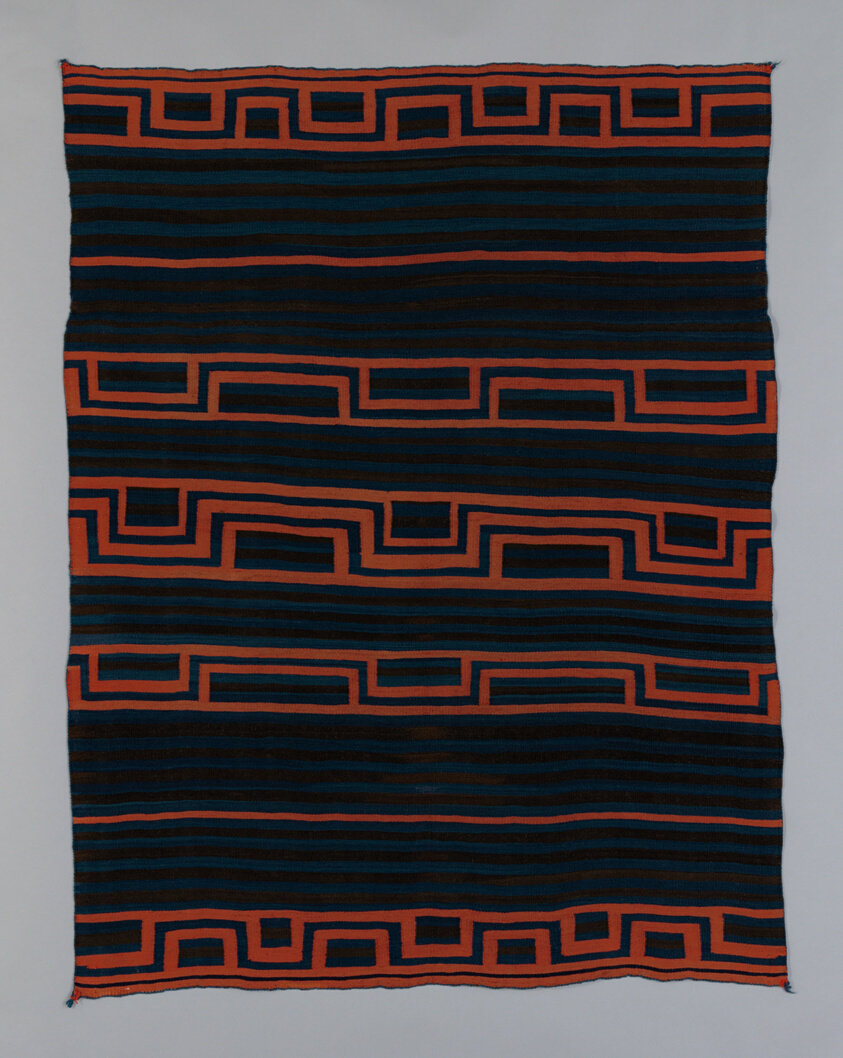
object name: Textile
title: Moqui-Style Sarape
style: navajo, native american, americas, indigenous, north american, native north american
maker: Navajo (Diné) (Arizona, New Mexico, and Utah, United States)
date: c. 1870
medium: Wool, single interlocking tapestry weave; two selvages present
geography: Navajo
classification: textile; weaving